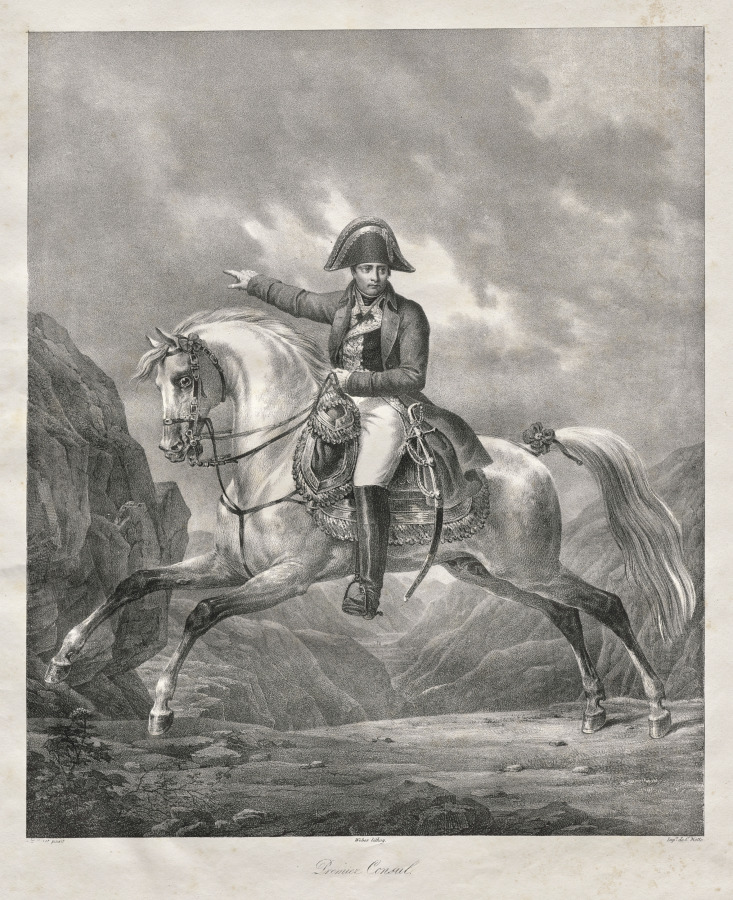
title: Premier Counsul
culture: France, 19th century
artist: Antoine Jean Weber (French, 1797–1875)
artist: after Horace Vernet (French, 1789–1863)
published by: Charles Motte (French, 1785–1836)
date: c. 1810–36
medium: lithograph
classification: Print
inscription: In plate, below image left: "H. Vernet pinxit"; Center, in plate, below image: "Weber Lithog"; lower right below image: "Imp. d. C. Motte"; Center, in plate, below image: "Premier Consul"